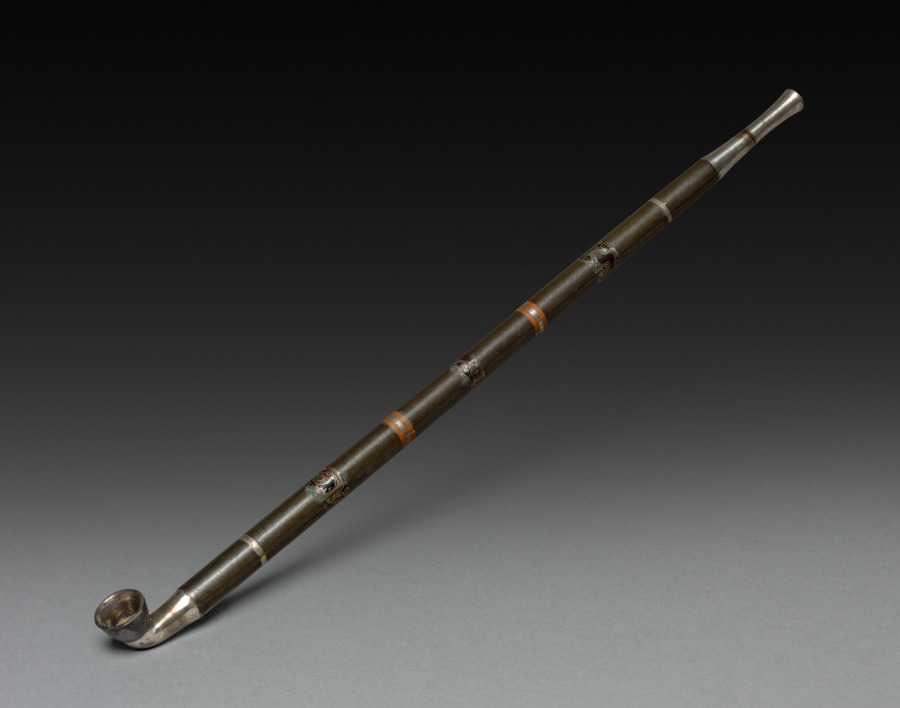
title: Tobacco Pipe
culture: Japan, Edo period (1615–1868)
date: 1700s to mid-1800s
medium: metal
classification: Miscellaneous